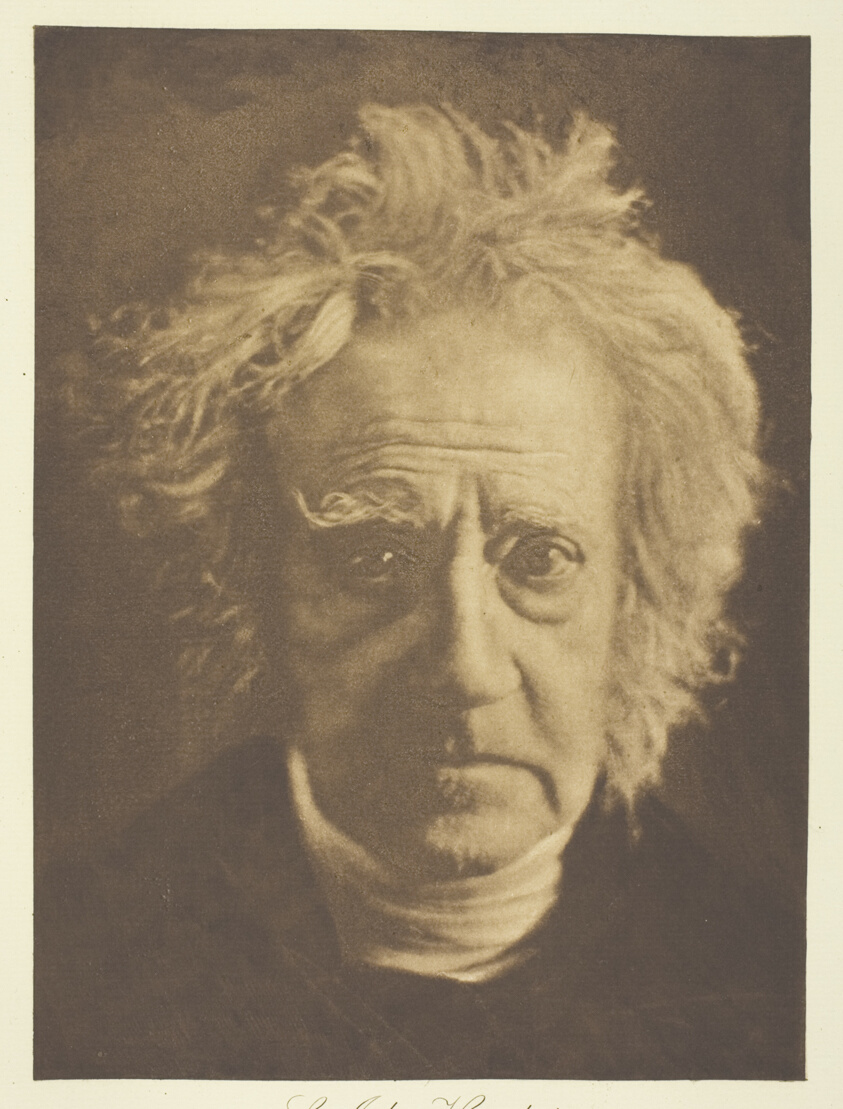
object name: Photograph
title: Sir John Herschel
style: 19th century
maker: Julia Margaret Cameron (English, 1815–1879)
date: 1867, printed c. 1893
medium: Photogravure, plate 11 from the album "Lord Tennyson and his Friends" (1893)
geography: England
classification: photogravure; photomechanical process; photography; photograph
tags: Collected by Hugh Edwards, Lord Tennyson and His Friends